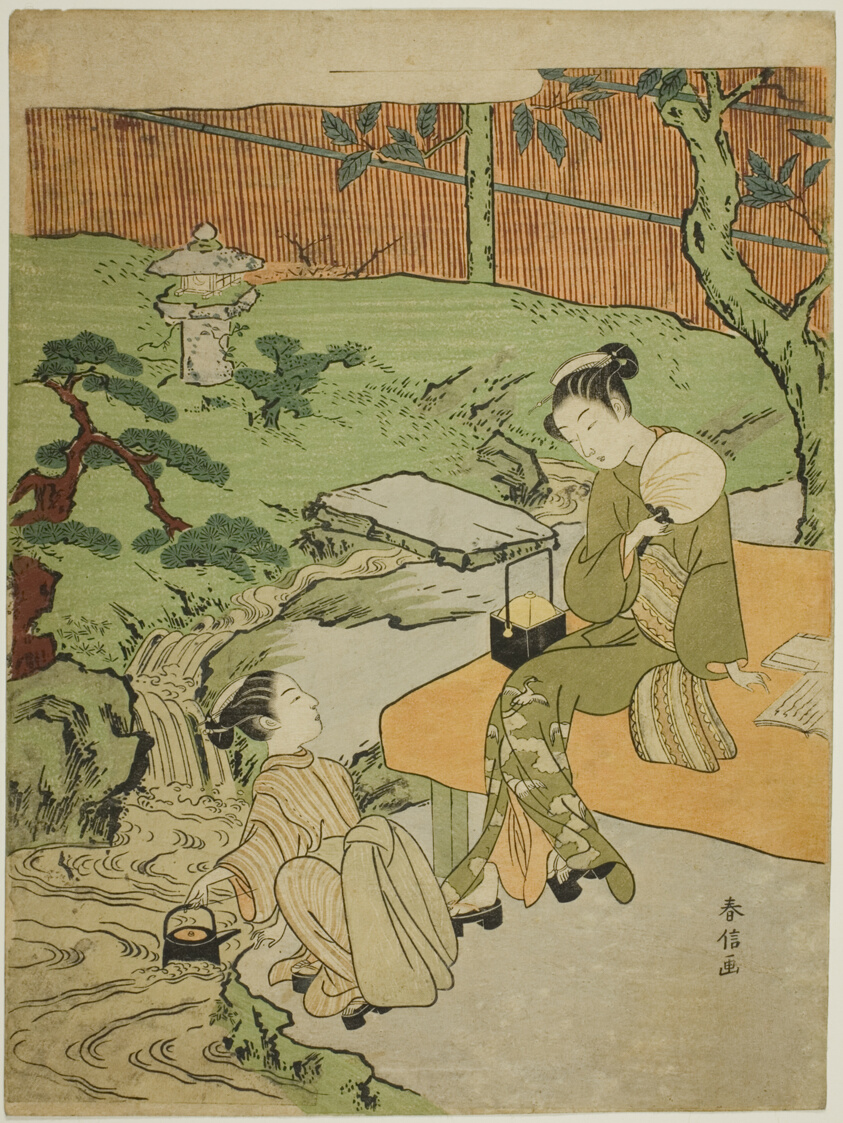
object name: Print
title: Two Girls Enjoying the Evening Cool in a Garden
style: Japanese (culture or style)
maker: Suzuki Harunobu 鈴木 春信; Japanese, 1725 (?)-1770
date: c. 1765/70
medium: Color woodblock print; chuban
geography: Japan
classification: woodblock print; print; asian art